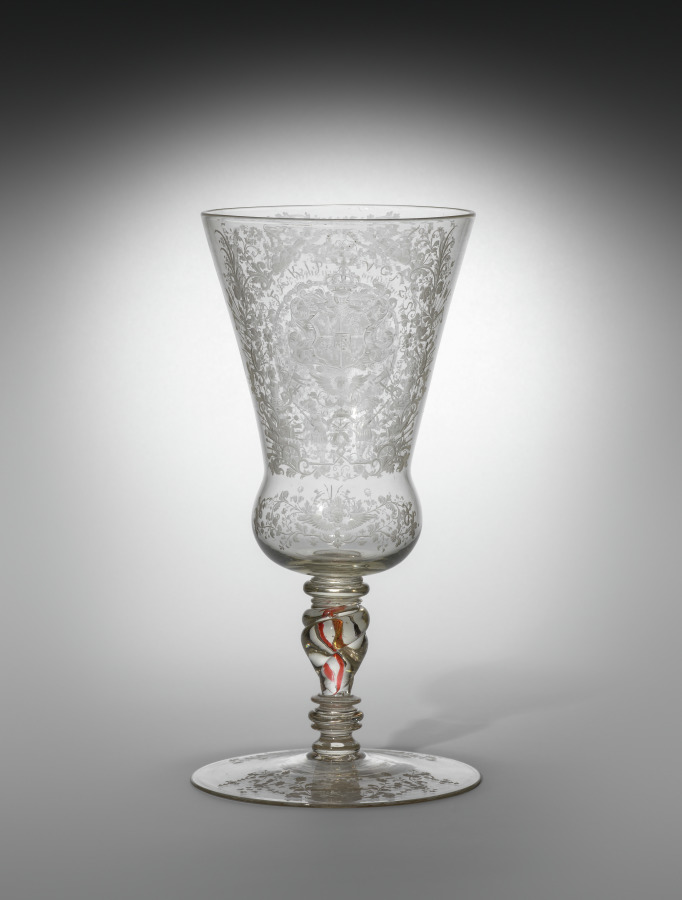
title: Standing Cup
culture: Bohemia, 18th century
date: c. 1715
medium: glass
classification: Glass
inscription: the German inscription engraved around the hunting scene translates as: When sorrow torments us enjoy a glass of wine and also the joy of a hunt; engraved on the opposite side: F.A.K.J.P.V.C.F.Z.S. (Friedrich August Keonig in Polen und Chur Fuerst zu Sachsen).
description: Engraved with arms of Saxony-Poland and Hunting Scene.